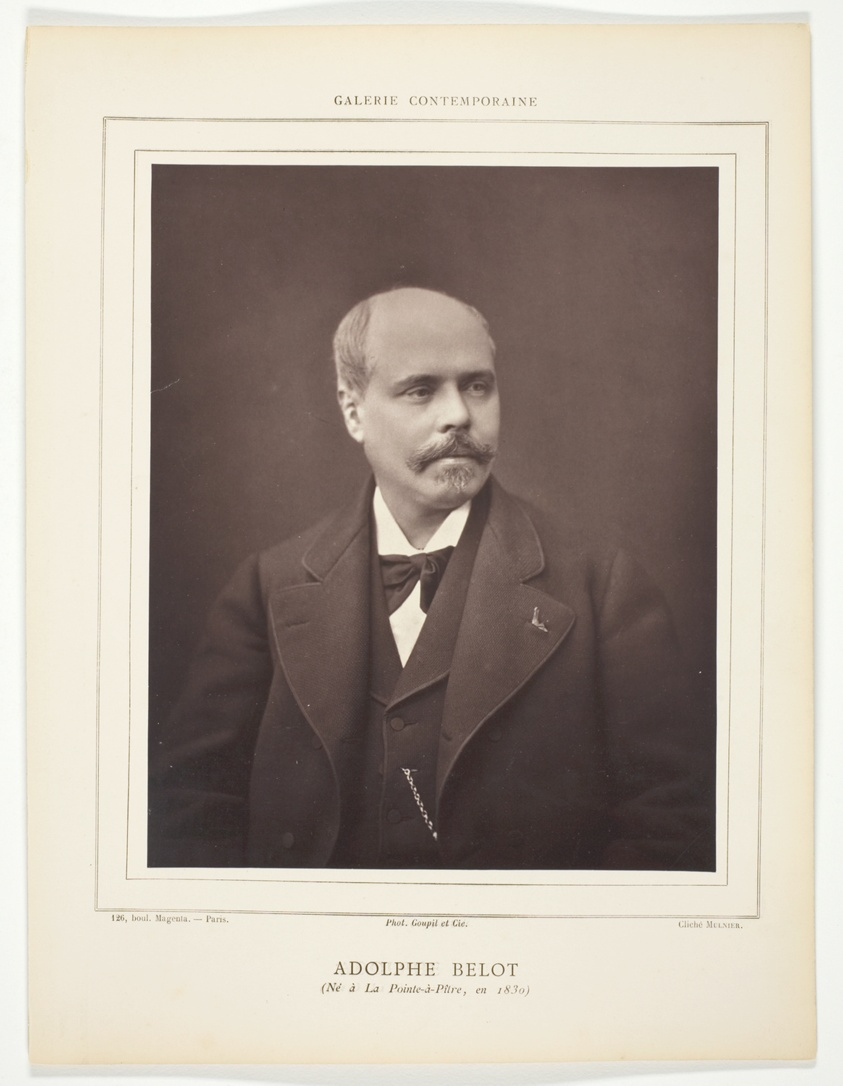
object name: Photograph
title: Aldophe Belot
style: 19th century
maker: Ferdinand J. Mulnier (French, active 1860–1890)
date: c. 1876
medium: Woodburytype, from the periodical “Galerie Contemporaine Littéraire, Artistique” (1879), volume 7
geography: France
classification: woodburytype; photomechanical process; photography; photograph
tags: Collected by Hugh Edwards, Contemporaine Littéraire